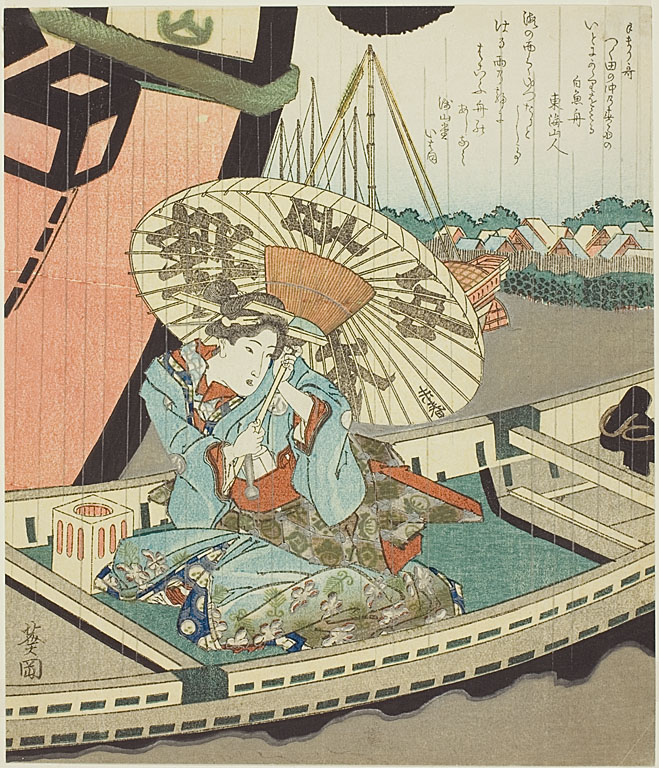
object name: Print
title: Beauty in a Boat during a Rainstorm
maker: Totoya Hokkei (Japanese, 1780-1850)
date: early 19th century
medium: Color woodblock print; surimono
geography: Japan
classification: woodblock print; print; asian art